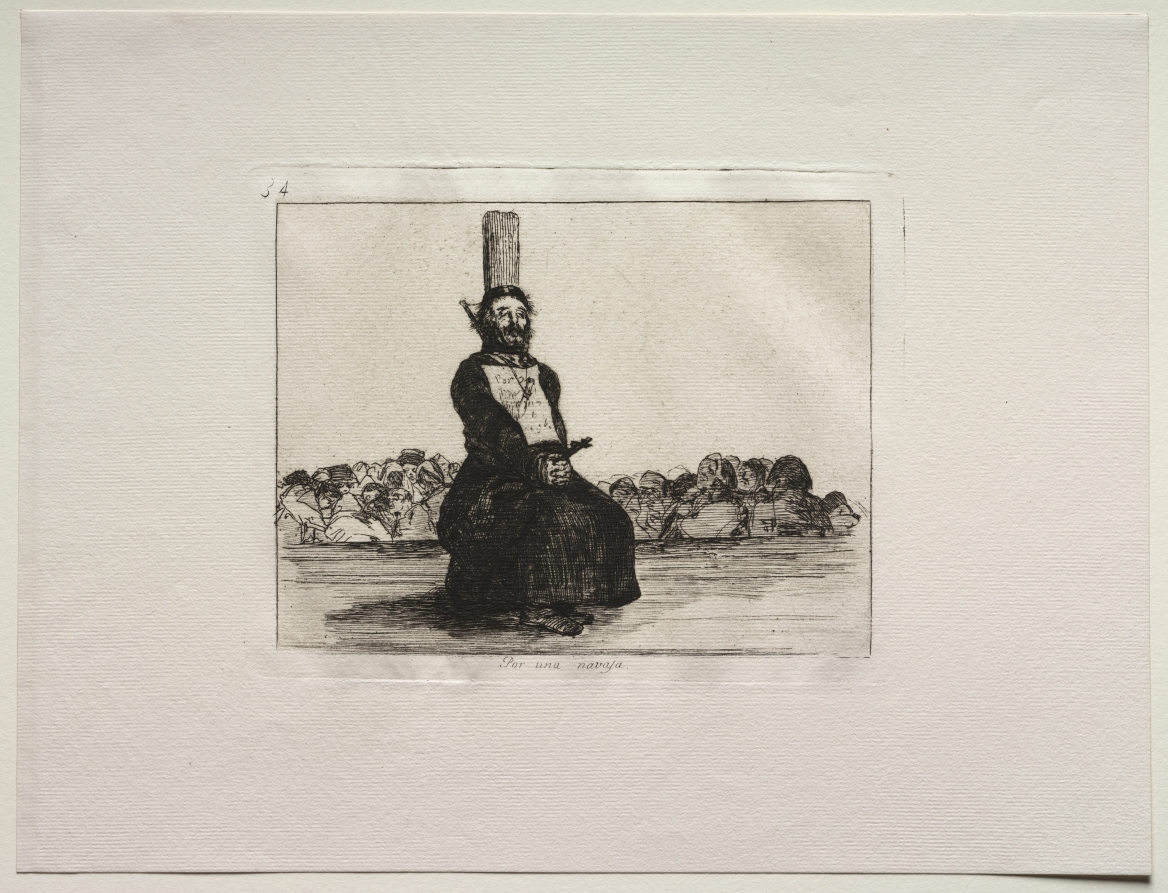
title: The Horrors of War: On Account of a Knife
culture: Spain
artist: Francisco de Goya (Spanish, 1746–1828)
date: c. 1810–20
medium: etching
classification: Print